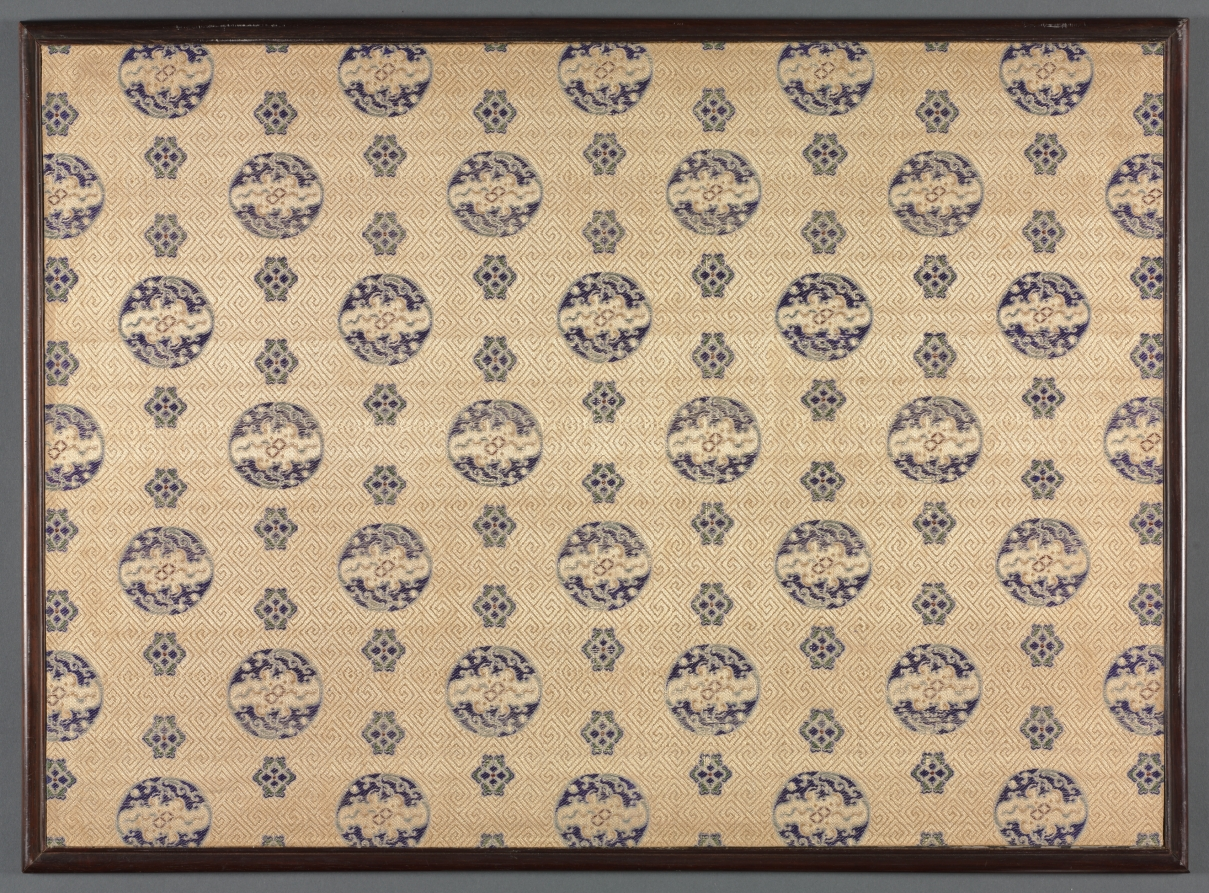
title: Twelve Views of Tiger Hill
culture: China, Ming dynasty (1368–1644)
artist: Shen Zhou (Chinese, 1427–1509)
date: after 1490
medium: Album of twelve leaves; ink or ink and slight color on paper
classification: Painting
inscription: [印] 启南; 石田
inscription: 1 colophon and 1 seal of Yao Yuanzhi 姚元之 (1776-1852). The brushwork of this album is aged and powerful. It is so vigorous that it gives you a feeling of the mist and clouds when looking at it. It could not be done by any other than the old master, Shen Zhou. Formerly the album was in the collection of Hu Zhishou's 胡之壽 family. After many changes of hands, it came finally into the possession of Ligeng 笠耕, the Keeper of the Imperial Stable [that is, Binliang 斌良, Manchurian poet-calligrapher, later the Imperial Resident in Lhasa, Tibet, 1784-1847]. Not long ago, when its former owner Zhishou came to visit me and found the album in my study, he sighed in nostalgia and told me that there were originally an inscription and colophons in the album which are now lost. Song Luo 宋犖 [zi 牧仲, 1634-1713] once had a poem by Shen Shitian on the painting of Tiger Hill. [The poem is missing from the album.] It must be a poem written for this album. However, according to Song's own title, the poem was composed after the rhymes and meter of the original poem on the album. Now there is no poem whatsoever in the frontispiece or at the end of the album. Is this what Zhishou meant - that the original colophons and inscriptions are missing? Ligeng, the Keeper of the Imperial Stable, has asked me for a colophon. The album has been left on my desk since last year. How time has passed! On the first day of the jiashen year 甲申 [1824], I returned from the Court Audience. The plum trees in the pots have started to blossom with their first fragrance. How much has this added to my enjoyment of the painting! I therefore write down a few words for your criticism. [signed] the Student of the Grass Leaf Pavilion, Yao Yuanzhi.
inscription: 3 seals of Hou Shigong 侯士恭 [late 19th–early 20th century]. (1 each on the colophon, seventh, and eleventh leaves).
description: Views of Tiger Hill depicts a historic site a few miles northwest of Suzhou. The scenes simulate a visit from arriving by boat at the foot of the mountain to climbing to Cloudy Cliff Monastery. Representations of the artist’s mature style, Shen Zhou included views in subtle colors in the suite of monochrome scenes. A Suzhou native, Shen Zhou was supported by family wealth and rejected an official career in favor of life as a retired scholar. Turning to painting in midlife, he is regarded as the founder of the Wu School of painting, with its center in Suzhou.